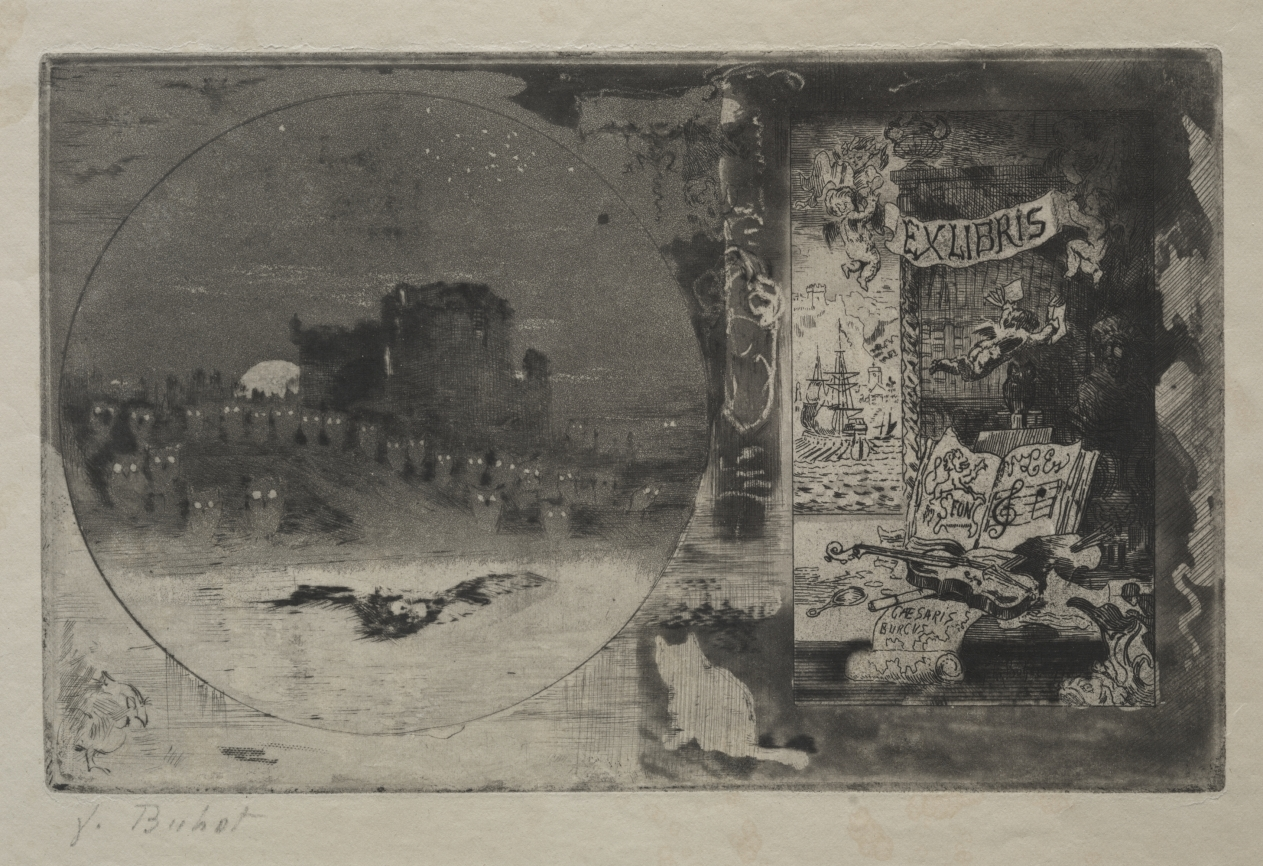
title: The Castle of the Owls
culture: France, 19th century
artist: Félix Hilaire Buhot (French, 1847–1898)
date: 1887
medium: etching, aquatint, drypoint and roulette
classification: Print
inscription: signed [?], lower left, in graphite: 'F. Buhot"